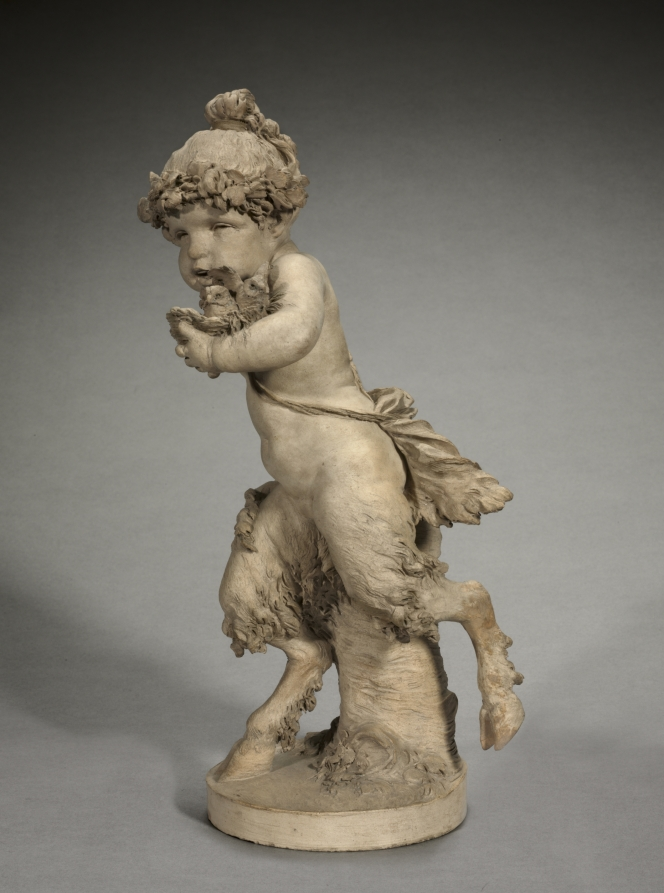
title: Young Satyress Running with an Owl's Nest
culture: France, 18th century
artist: Clodion (French, 1738–1814)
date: 1770s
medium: terracotta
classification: Sculpture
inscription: signature incised on back: CLODION.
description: These works by French sculptor Claude Michel, known as Clodion (1738–1814), shows a pair of young satyrs. Clodion was fond of depicting characters from classical antiquity in his work, and the subject of child or baby satyrs in Bacchanalian celebrations appear often in the work of Rococo artists. The female satyr wraps a plump arm around a nest filled with baby birds, while her male counterpart holds an owl. Balancing on one foot, the two flee the scene of their theft.